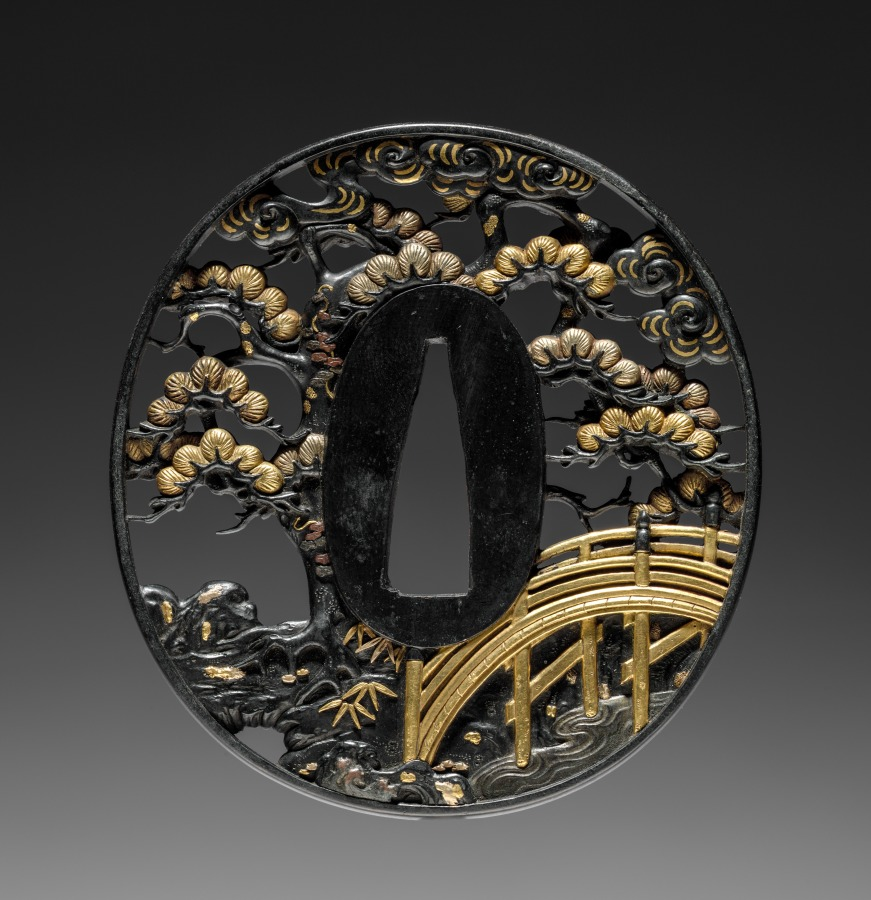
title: Sword Guard (Tsuba) with Bridge and Pine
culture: Japan, Edo period (1615–1868)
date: mid-1800s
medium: iron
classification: Arms and Armor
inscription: signed: 鶴舞齋正實